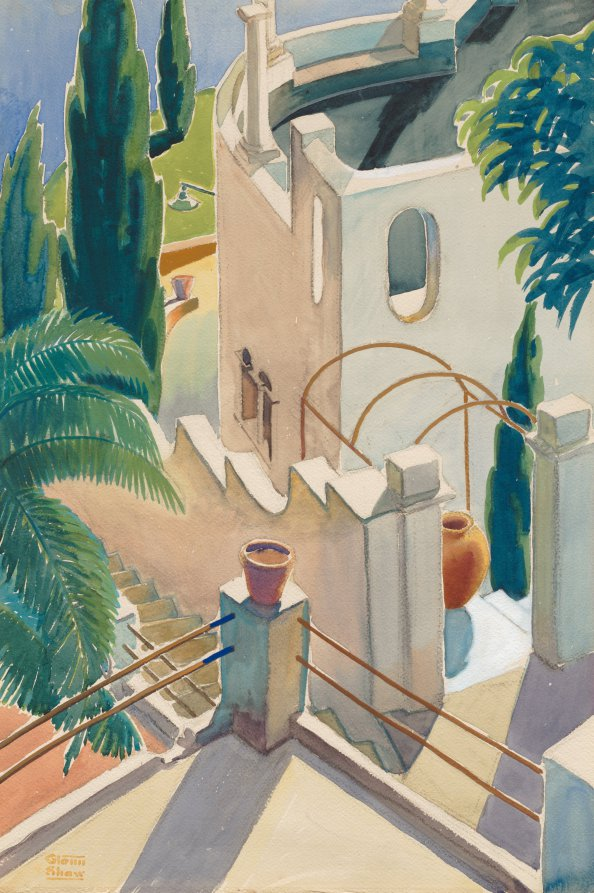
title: From Our Balcony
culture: America, Ohio, Cleveland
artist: Glenn Moore Shaw (American, 1891–1981)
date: 1928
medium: watercolor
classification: Drawing